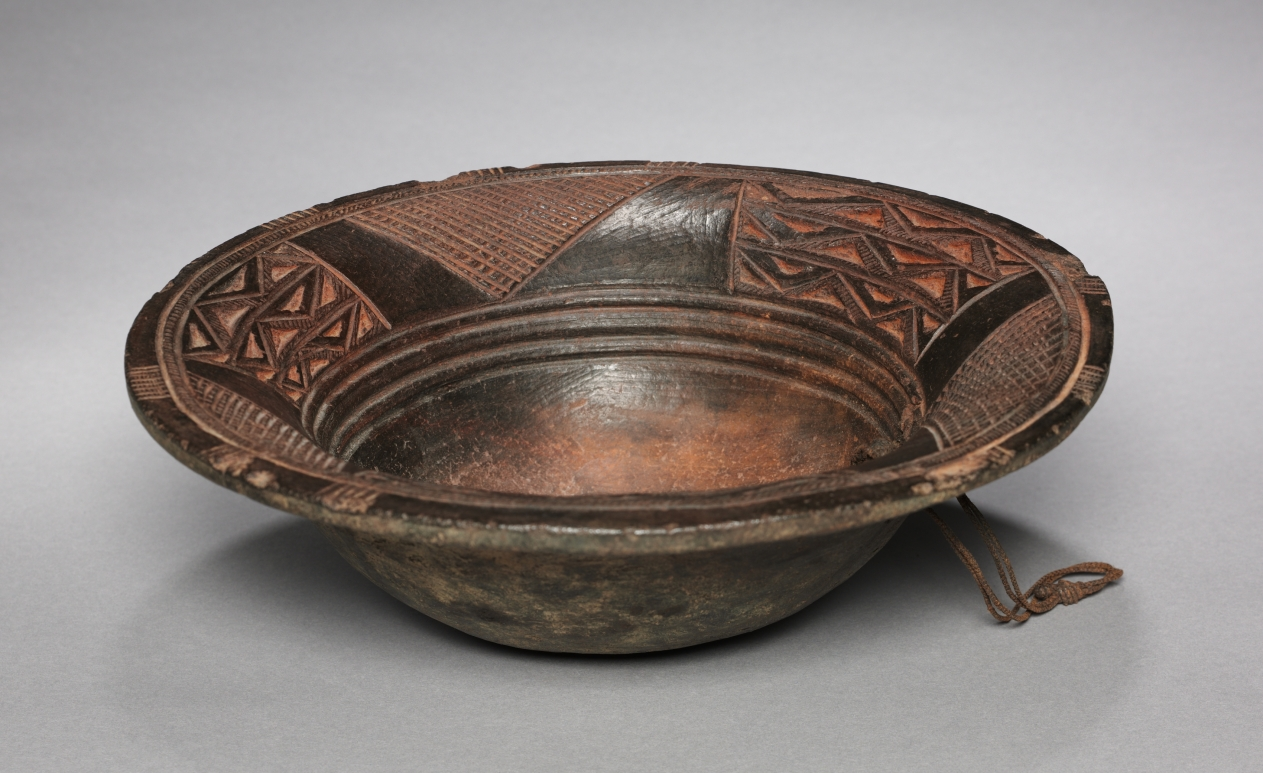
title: Bowl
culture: Africa, Central Africa, Democratic Republic of the Congo, Kuba-style maker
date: early 1900s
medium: Earthenware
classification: Vessels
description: This bowl probably once held cosmetics and was hung up when not in use. The Kuba are widely known for finely crafted luxury goods decorated with geometric, linear patterning. Although made of pottery, this bowl closely resembles carved wood. Visual puns of this sort, in which one kind of material is made to look like another, are much appreciated by the Kuba.